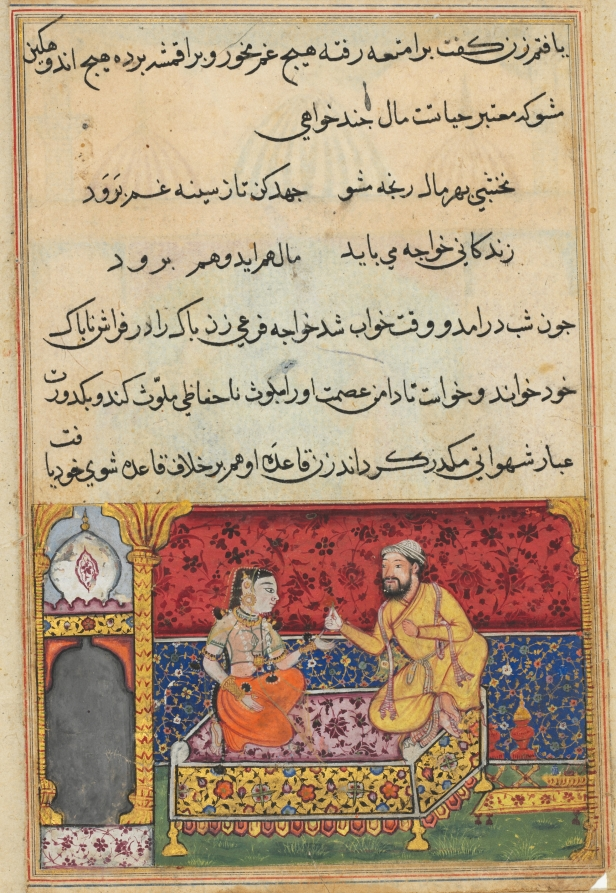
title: The young man changes himself to look like Mansur, and thus inveigles himself into the bed of Mansur’s wife, but is put off by her, from a Tuti-nama (Tales of a Parrot): Seventeenth Night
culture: Mughal India, court of Akbar (reigned 1556–1605)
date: c. 1560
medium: gum tempera, ink, and gold on paper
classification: Painting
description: The lascivious young man who magically transformed himself to have the appearance of Mansur the merchant kneels on an arabesque-patterned bed with Mansur’s wife. Although he looks like her husband, his actions and personality are different, so the woman suspects something is amiss and feigns illness to stall the imposter’s advances.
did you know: The imposter offers the woman a packet of paan to freshen her breath before love play.